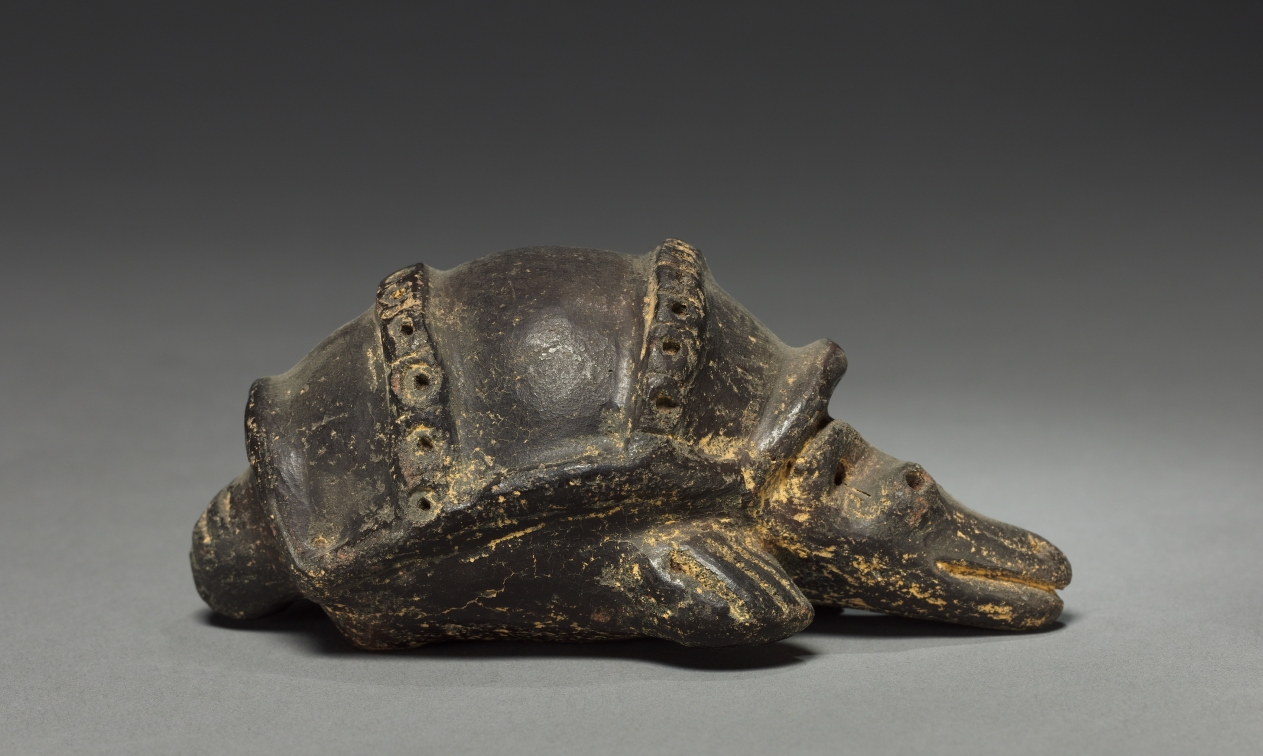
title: Armadillo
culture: Colombia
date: before 1921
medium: pottery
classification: Ceramic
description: Rattles that combine ravens, humans, and frogs are among the best known but least understood of the Northwest Coast object types. They clearly have mythic import and may have originated as shamans’ implements. But historically chiefs used them during secular parts of winter dances.